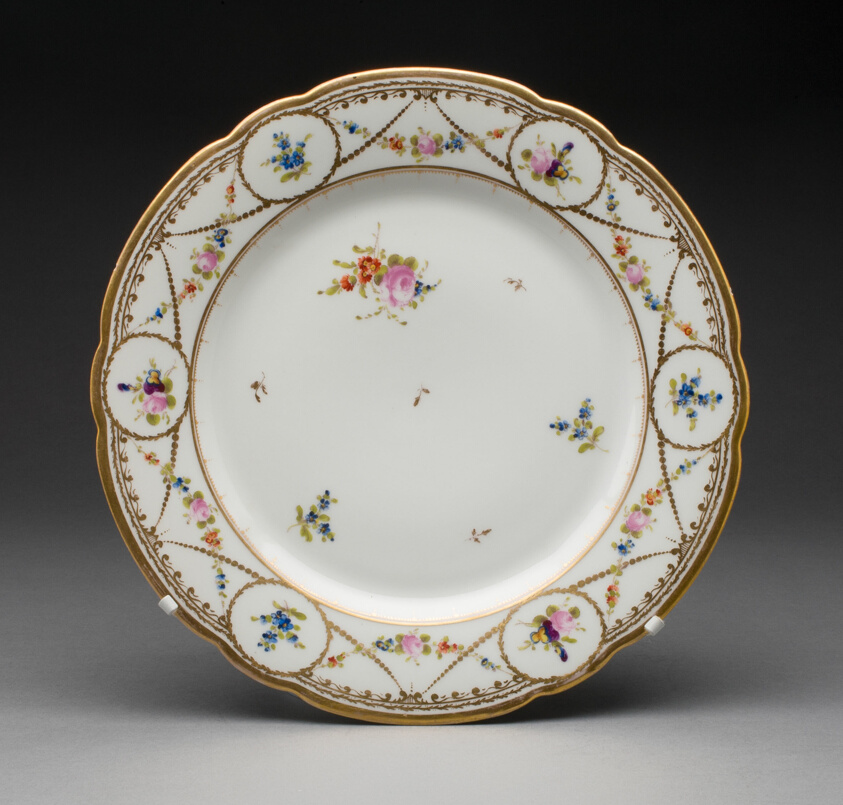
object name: Ceramics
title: Plate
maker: Switzerland, Nyon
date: c. 1780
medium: Porcelain, polychrome enamels, and gilding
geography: Nyon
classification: plate (general, dish); tableware; dish (vessel); porcelain; european decorative arts; ceramics